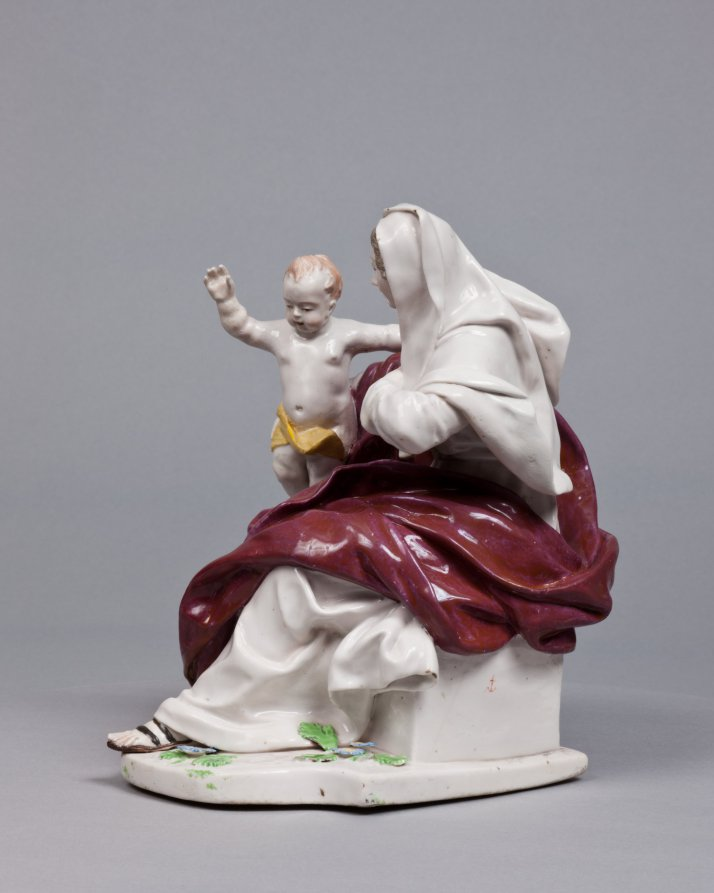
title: Madonna and Child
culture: England, Chelsea, 18th century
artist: Chelsea Porcelain Factory (Britain, London, 1745–84)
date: c. 1755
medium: porcelain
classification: Ceramic